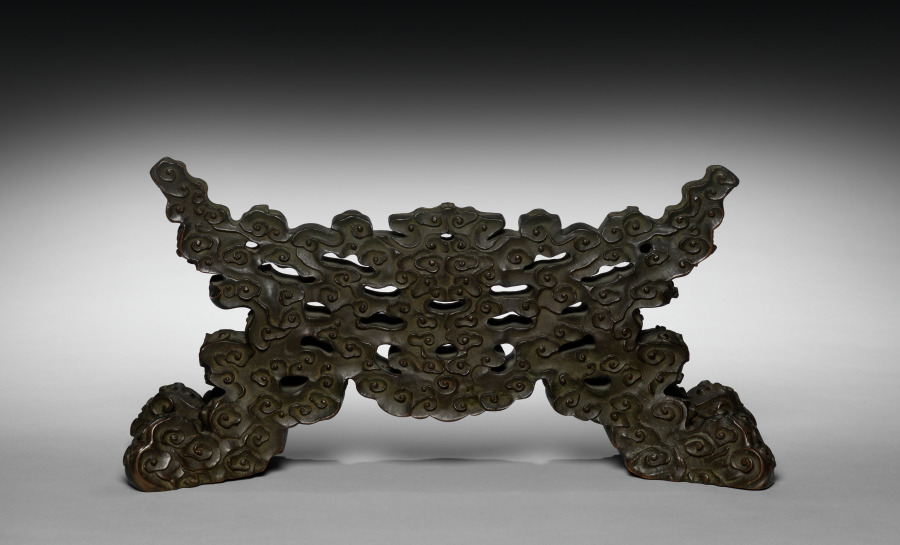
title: Stand for Screen with European Figures (obverse) and Landscape (reverse)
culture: China, Beijing palace workshops, Qing Dynasty (1644-1911), Qianlong reign (1736-1795)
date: 1736–95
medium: cast iron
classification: Metalwork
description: This is a cast-iron stand for a two-sided table screen. One side of the screen is an enamel-painted copper plaque with European figures. The reverse side is a glass painting of architectural landscape in the Chinese style.